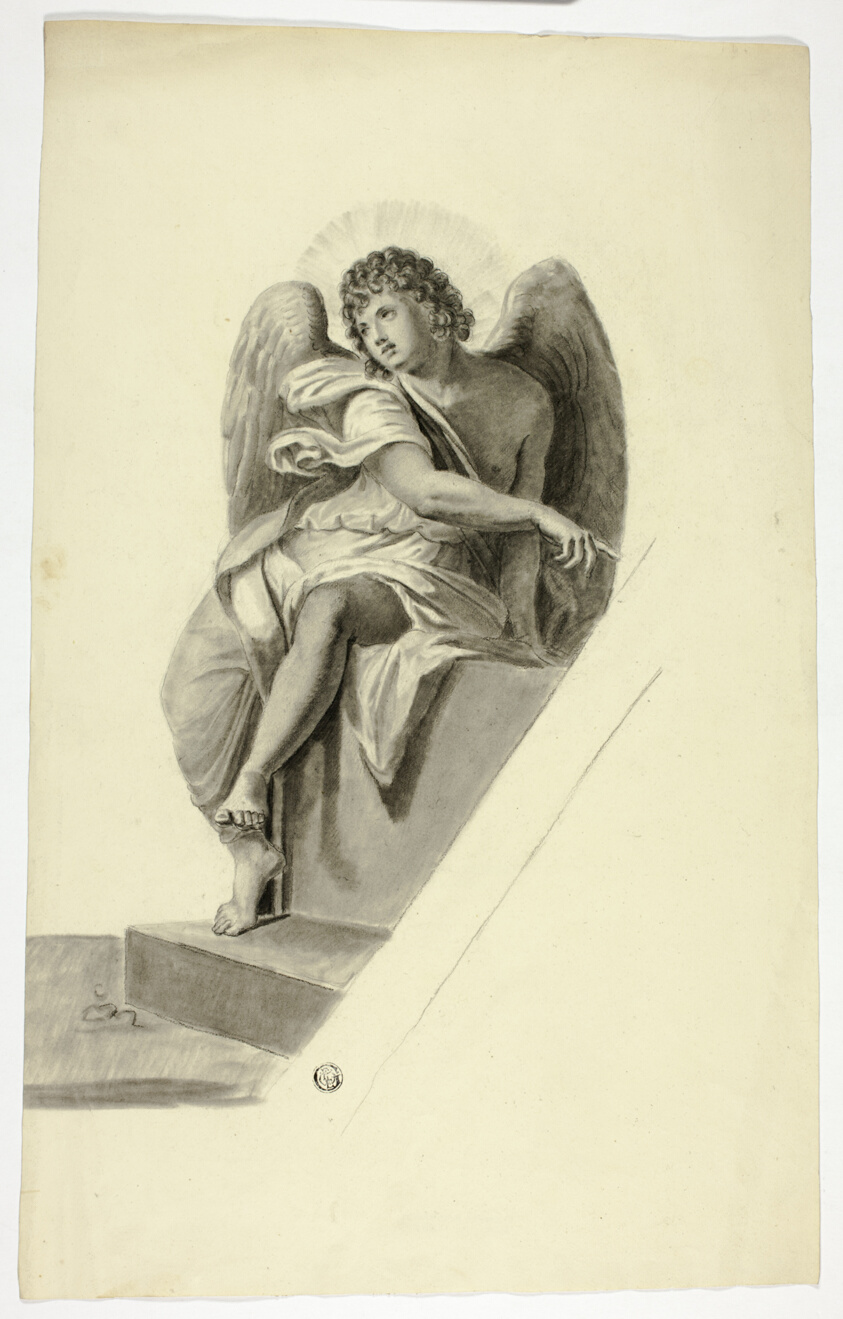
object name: Drawing and Watercolor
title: Angel Seated by Tomb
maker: Elizabeth Murray (English, c. 1815-1882)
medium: Black chalk and brush and gray wash, over graphite, on cream wove paper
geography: England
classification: chalk; drawings (visual works); prints and drawing